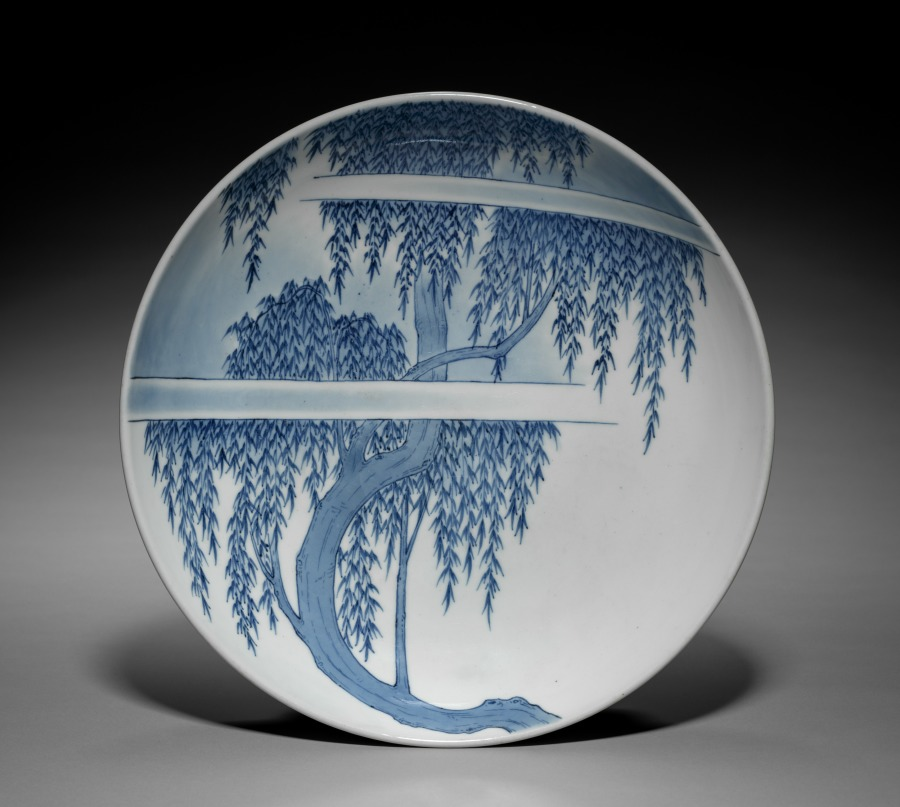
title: Plate with Willow Tree and Cloud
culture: Japan, Edo period (1615–1868)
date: 1800s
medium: Porcelain with underglaze blue (Hizen ware, Nabeshima style)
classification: Ceramic